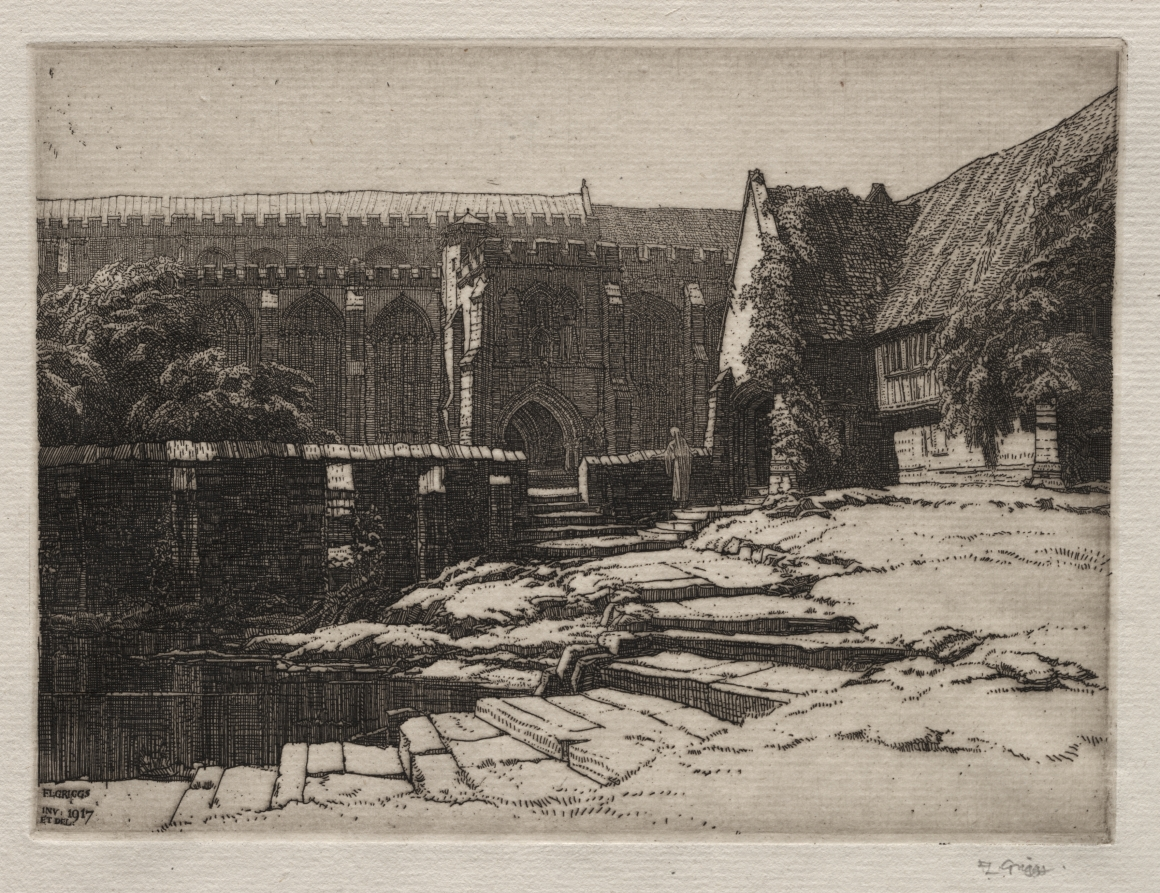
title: Sellenger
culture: England, 20th century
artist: Frederick Landseer Maur Griggs (British, 1876–1938)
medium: etching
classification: Print